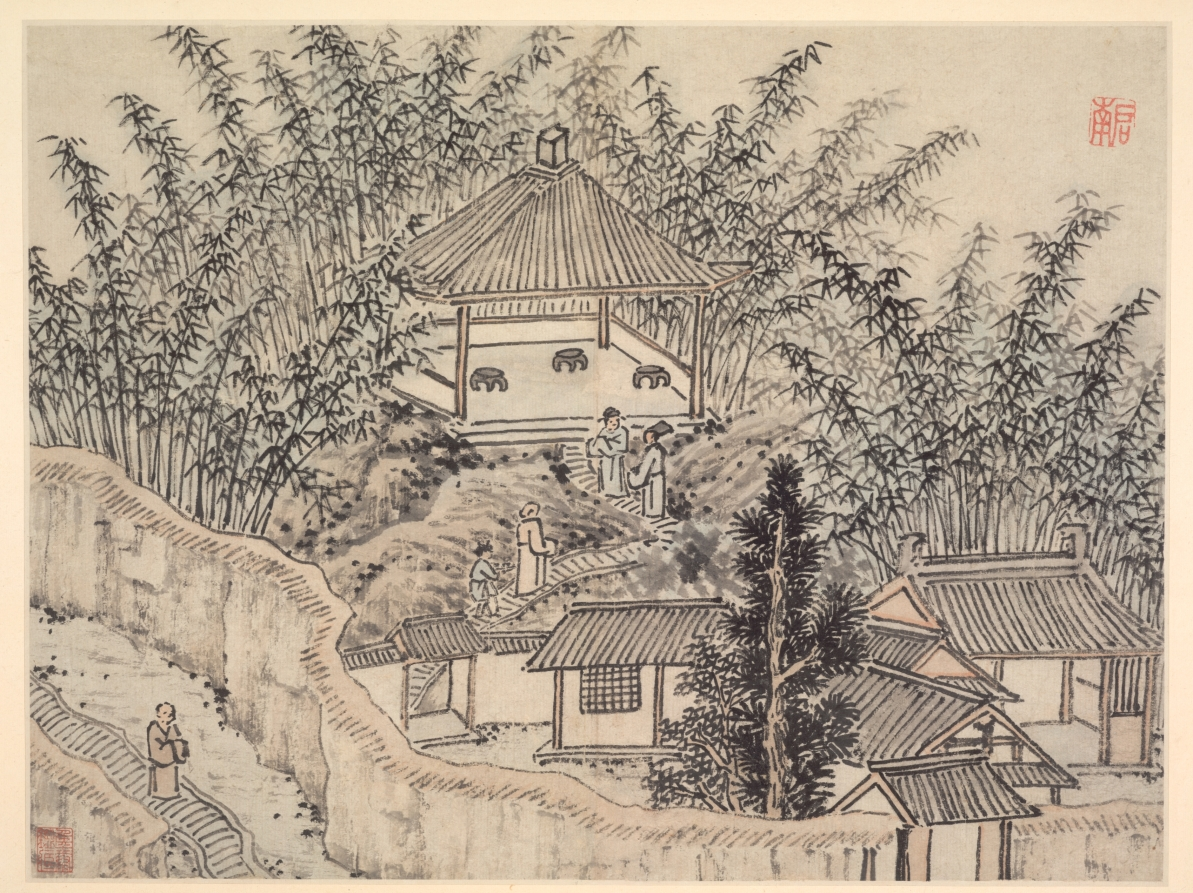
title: Bamboo Pavilion, Tiger Hill, from Twelve Views of Tiger Hill, Suzhou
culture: China, Ming dynasty (1368–1644)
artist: Shen Zhou (Chinese, 1427–1509)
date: after 1490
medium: Album leaf; ink on paper or ink and slight color on paper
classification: Painting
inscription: [印] 启南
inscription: seal of Hou Shigong 侯士恭 [late 19th–early 20th century]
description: Views of Tiger Hill depicts a historic site a few miles northwest of Suzhou. The scenes simulate a visit from arriving by boat at the foot of the mountain to climbing to Cloudy Cliff Monastery. Representations of the artist’s mature style, Shen Zhou included views in subtle colors in the suite of monochrome scenes. A Suzhou native, Shen Zhou was supported by family wealth and rejected an official career in favor of life as a retired scholar. Turning to painting in midlife, he is regarded as the founder of the Wu School of painting, with its center in Suzhou.